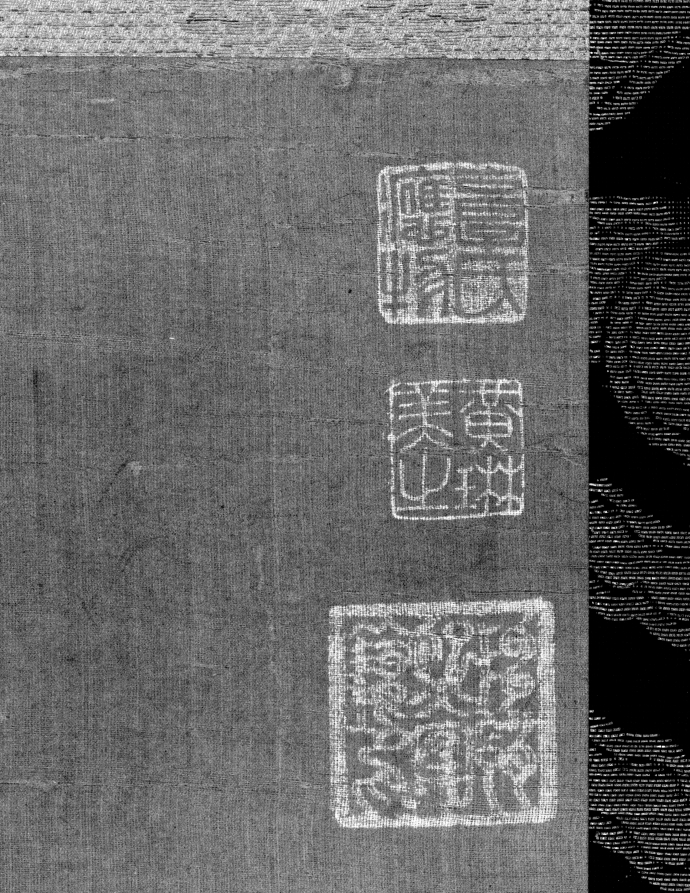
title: The Hermit Xu You Resting by a Stream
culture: China, Ming dynasty (1368–1644)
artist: Dai Jin (Chinese, 1388–1462)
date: 1400s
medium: Hanging scroll; ink and slight color on silk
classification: Painting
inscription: 5 seals: 1 of Huang Lin 黄琳 (active about 1496–1532); 4 unidentified.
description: Xu You, a recluse who refused the throne offered to him by legendary Emperor Yao, chose instead to farm on Mount Ji. Sitting under cliffs, his left arm resting on his risen leg and his loose robe revealing his belly, he displays a nonchalant attitude. Xu You is wearing a laborer’s outfit, a short robe and tight leggings, while his composed pose and gentle features reveal his lofty character. The composition shows rising mountains on the left juxtaposed by open space on the far right. Powerful brushstrokes and nuanced ink washes follow the style of the Southern Song (1127–1279) academy painters.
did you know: When the emperor offered him a post overseeing the Nine Territories (as China was known in ancient times), Xu You went to the River Ying to cleanse his ears from such an unwelcome proposition.